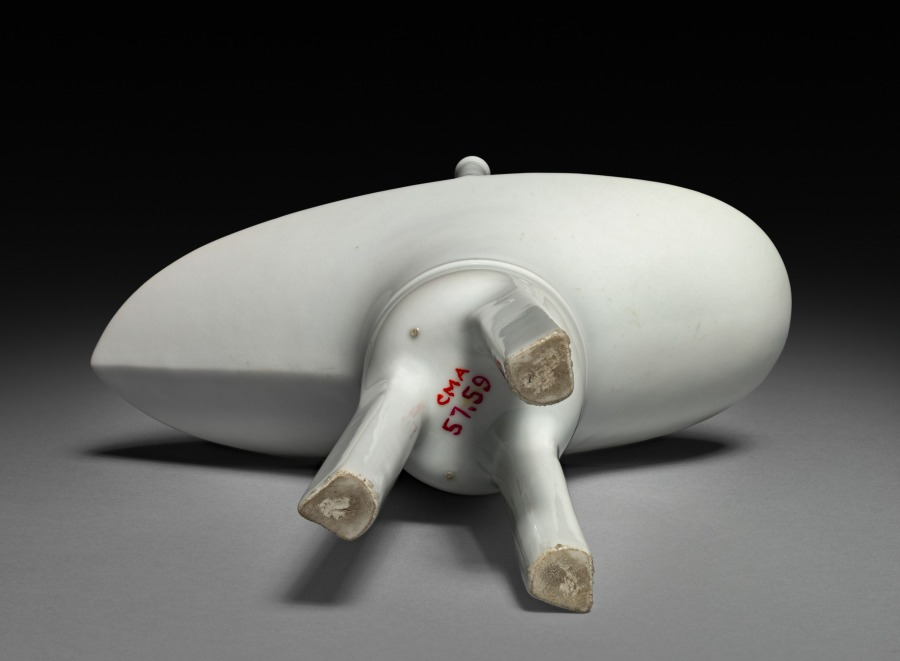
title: Libation Cup (Jue)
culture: China, Ming dynasty (1368-1644), Yongle reign (1402-1424)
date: 1402–1424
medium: glazed porcelain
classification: Ceramic